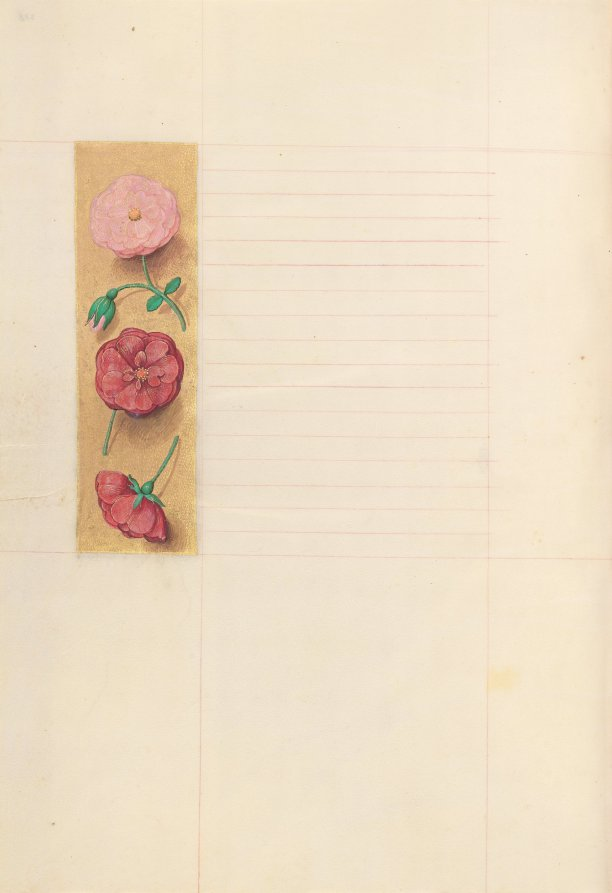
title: Hours of Queen Isabella the Catholic, Queen of Spain: Fol. 278v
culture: Flanders, Ghent and Bruges, late 15th century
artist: Master of the First Prayerbook of Maximillian (Flemish, c. 1444–1519)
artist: and Associates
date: c. 1500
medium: ink, tempera, and gold on vellum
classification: Bound Volume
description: This manuscript was illuminated by a circle of at least five highly organized manuscript painters active in the Flemish cities of Ghent and Bruges. The principal illuminator was Alexander Bening, who painted the majority of the book's miniatures. Manuscripts produced by this circle of artists are renowned for the decoration of their borders, which typically feature a rich variety of realistically-painted flowers, birds, and butterflies. This prayer book, called a book of hours, was intended not for a cleric, but for the private devotions of a lay person-in this case, Isabella the Catholic, Queen of Spain (1451-1504). Isabella's coat of arms embellishes the book's frontispiece. It is unlikely that the book was commissioned by the Queen herself; rather, she probably received it as a diplomatic gift from someone courting her patronage, perhaps Cardinal Francisco Jimenez de Cisneros. A Franciscan friar, Jimenez was dependent upon Isabella for his advancement, first to the post of Queen's confessor in 1492, and then to Archbishop of Toledo in 1495.